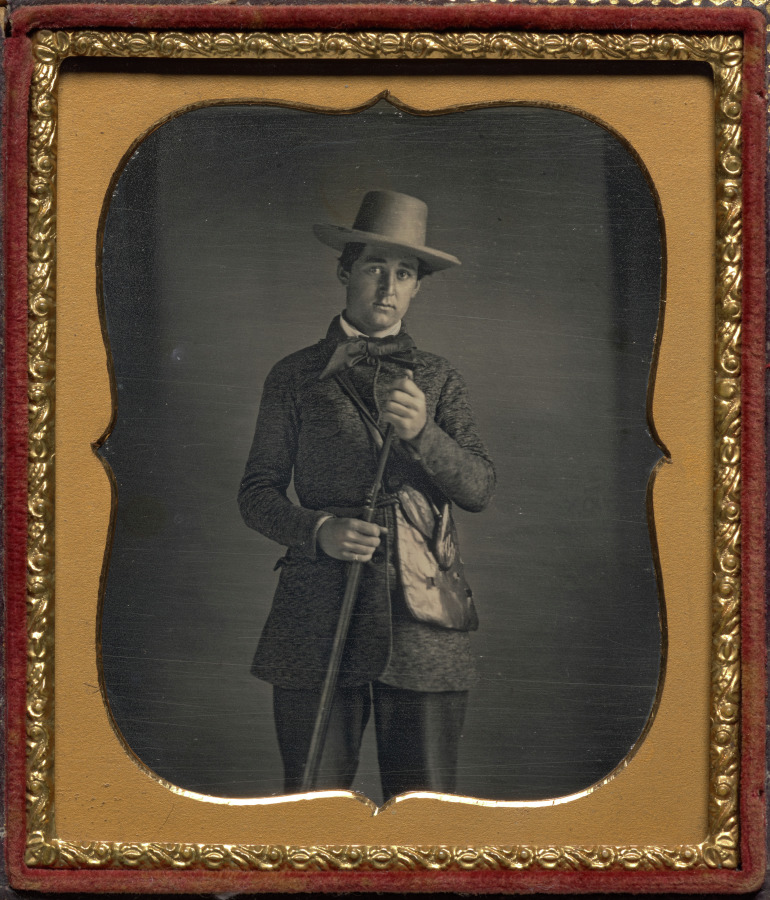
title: Hunter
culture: America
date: c. 1862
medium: daguerreotype, sixth plate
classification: Photograph